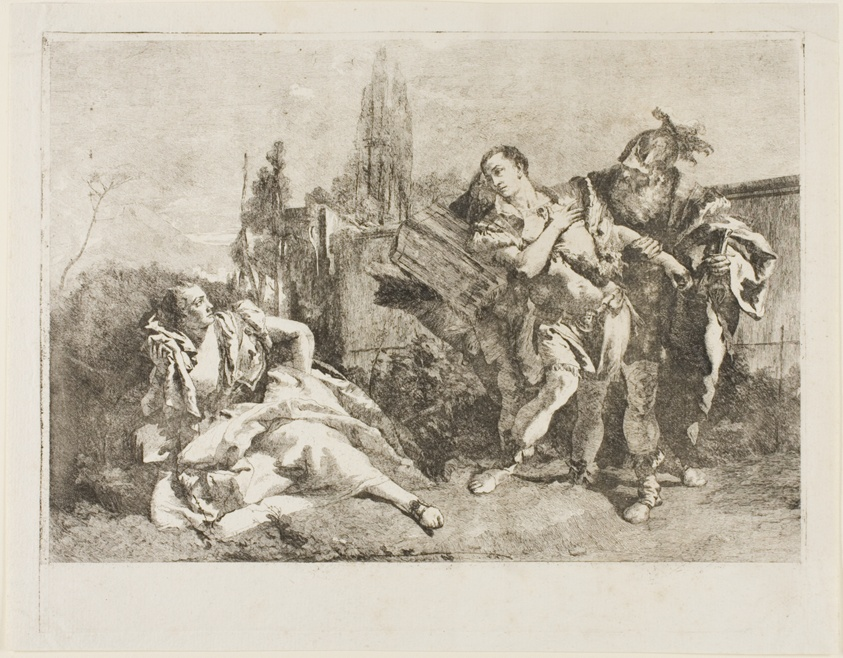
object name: Print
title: Rinaldo Leaving Armida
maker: Lorenzo Tiepolo (Italian, 1736-1776); after Giambattista Tiepolo (Italian, 1696-1770)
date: c. 1753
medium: Etching and drypoint on paper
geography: Italy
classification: etching; print; prints and drawing